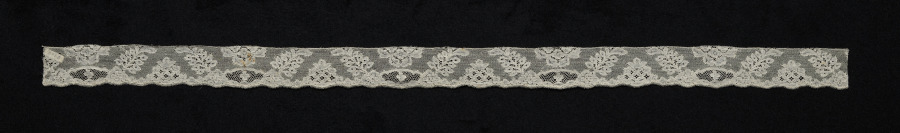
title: Lace Edging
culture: Belgium, Mechelen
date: 1740–60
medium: Bobbin lace outlined with silk cordonnet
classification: Lace